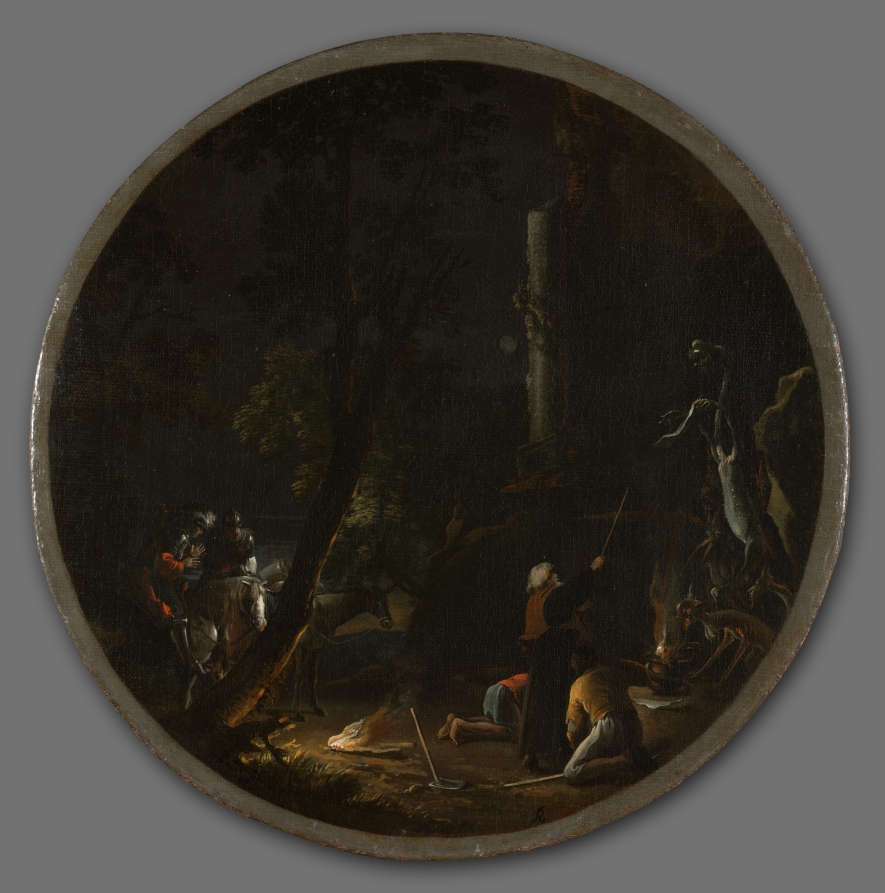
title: Scenes of Witchcraft: Night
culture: Italy, 17th century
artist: Salvator Rosa (Italian, 1615–1673)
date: c. 1645–1649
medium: oil on canvas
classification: Painting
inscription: Signed: "SR [monogram]"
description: In the pitch black of night, two groups of men are gathered in a forest. To the left, travelers apprehensively pause to watch a magician conjure terrifying apparitions. Since the Middle Ages, necromancy, the act of communing with the dead, was associated with male sorcerers. In Rosa's painting, the wizened necromancer who stands tall and resolute directly below a classical column is reminiscent of Moses, a predecessor to Renaissance depictions of sorcerers. Rosa's learned magicians not only invoke associations with philosophers and intellects, but they would have also referred to the artist himself and the intellectual elite with whom he associated in Florence. Just as a powerful magician could conjure strange creatures with his wand, so too could Rosa shape a strange world with his originality, intelligence, and the skillful use of paint and brush.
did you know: The artist chose the painting's shape to reference the foundational role of the circle in practicing magic.